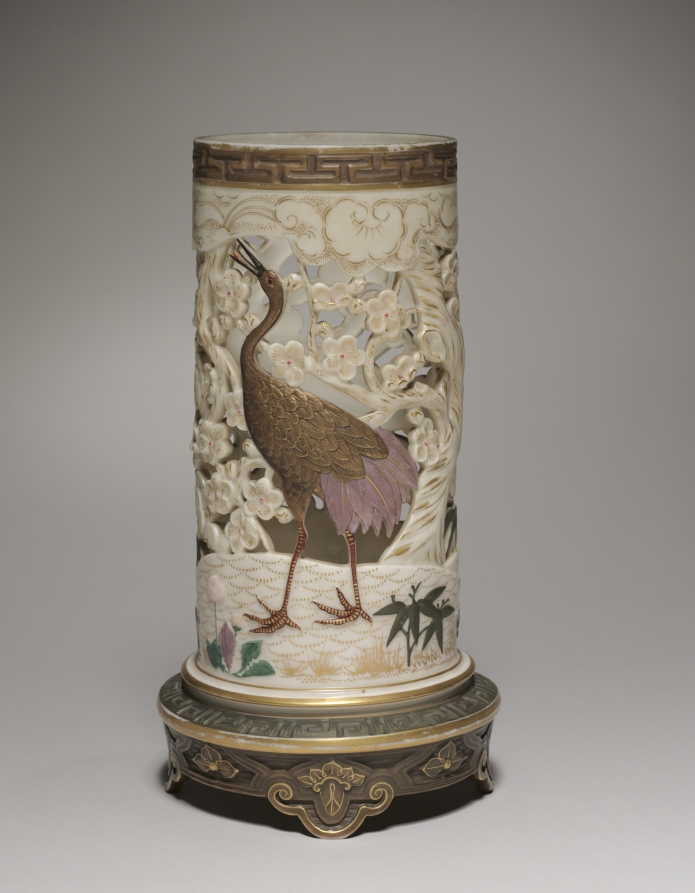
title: Vase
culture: England, 19th century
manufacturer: Worcester Porcelain Factory (British, established 1751)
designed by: probably by James Hadley (British)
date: 1873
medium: ceramic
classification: Ceramic